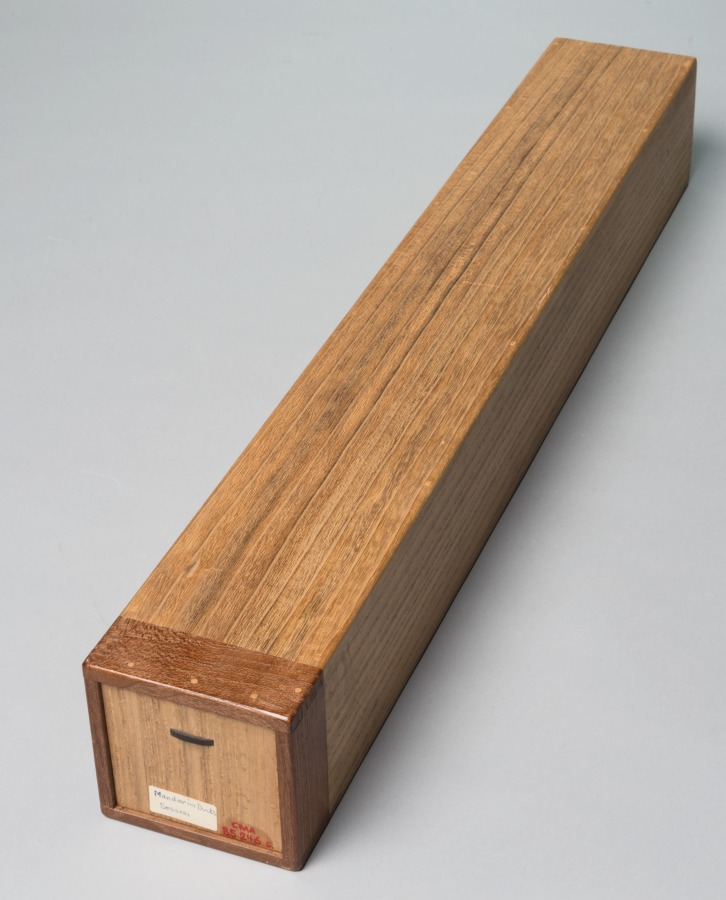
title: Mandarin Duck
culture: Japan, Muromachi period (1392–1573)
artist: Sesson Shūkei (Japanese, c. 1492–c. 1577)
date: 1500s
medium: hanging scroll; ink on paper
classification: Painting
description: In this painting, the artist depicted a scene of a solitary duck floating by reeds in a subtle arrangement of dry and wet, light and dark ink tones which conveys the tranquility of the moment.